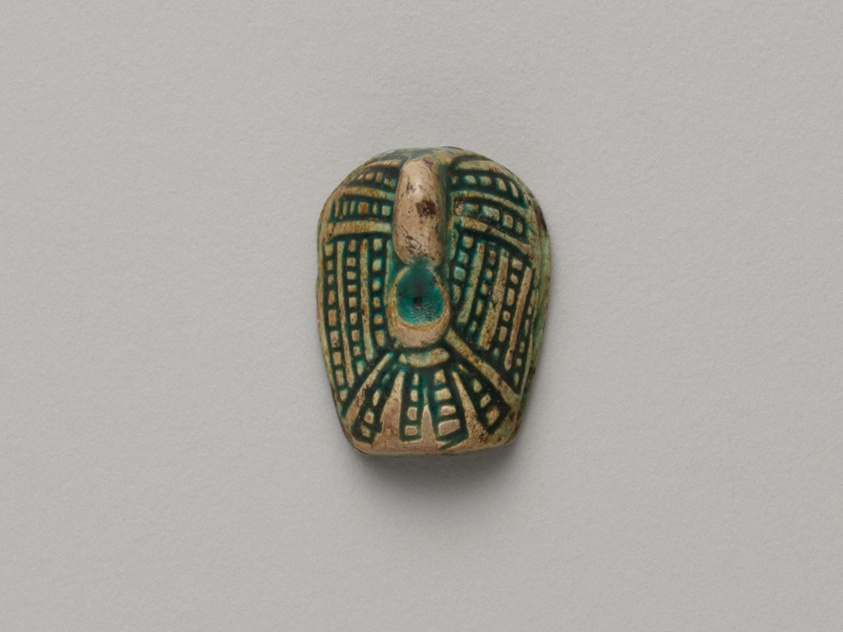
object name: Costume and Accessories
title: Scaraboid in the Form of a Duck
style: new kingdom, egyptian, ancient, eighteenth dynasty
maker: Egyptian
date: New Kingdom, Dynasty 18 (about 1550–1295 BCE)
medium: Glazed steatite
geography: Egypt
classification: scaraboids; seal; amulet; ancient art; costume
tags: ducks, cobras, musical instruments